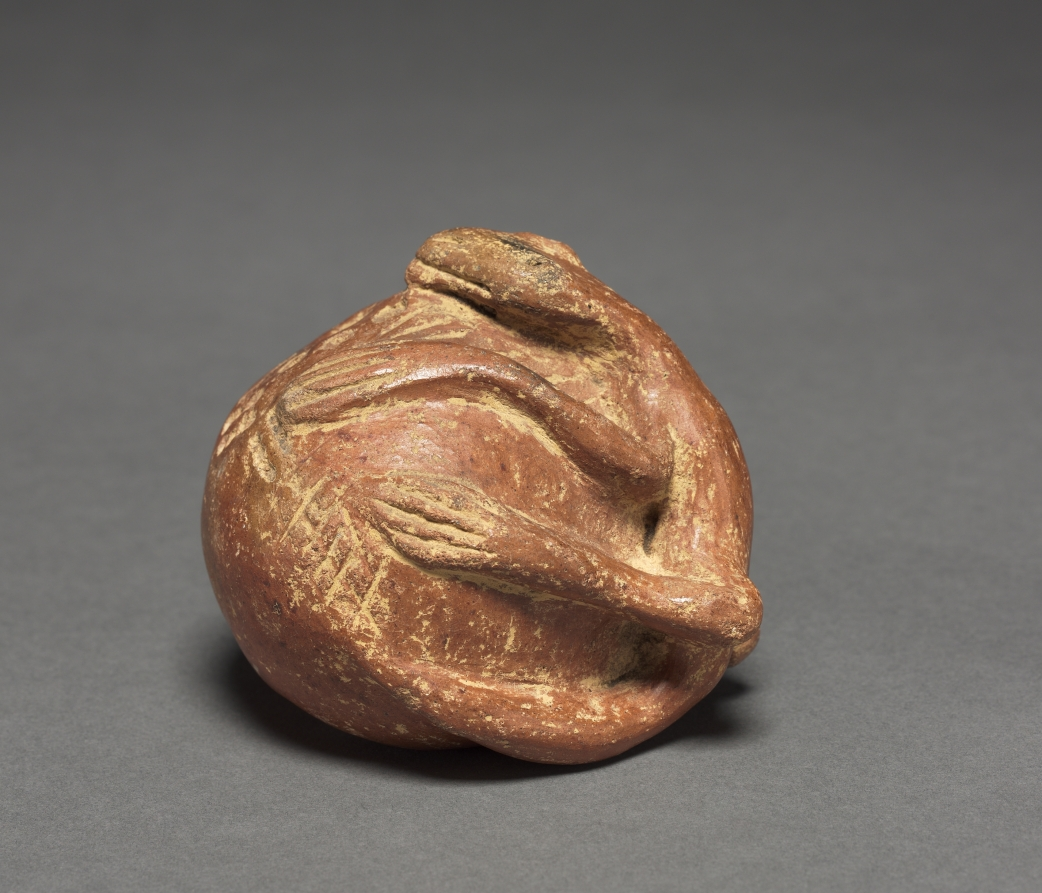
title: Chameleon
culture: Colombia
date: before 1921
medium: red ware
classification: Ceramic